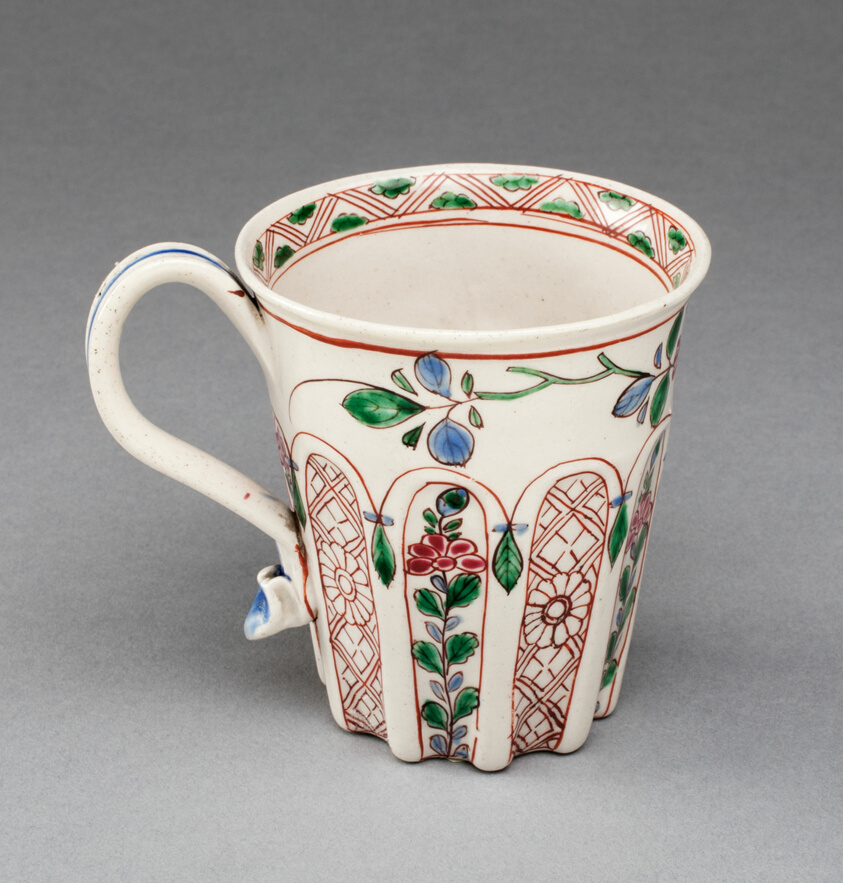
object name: Ceramics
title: Cup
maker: Staffordshire, England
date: c. 1760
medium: Salt-glazed stoneware, polychrome enamels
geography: Staffordshire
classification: drinking vessel; european decorative arts; ceramics; stoneware; salt-glazed stoneware